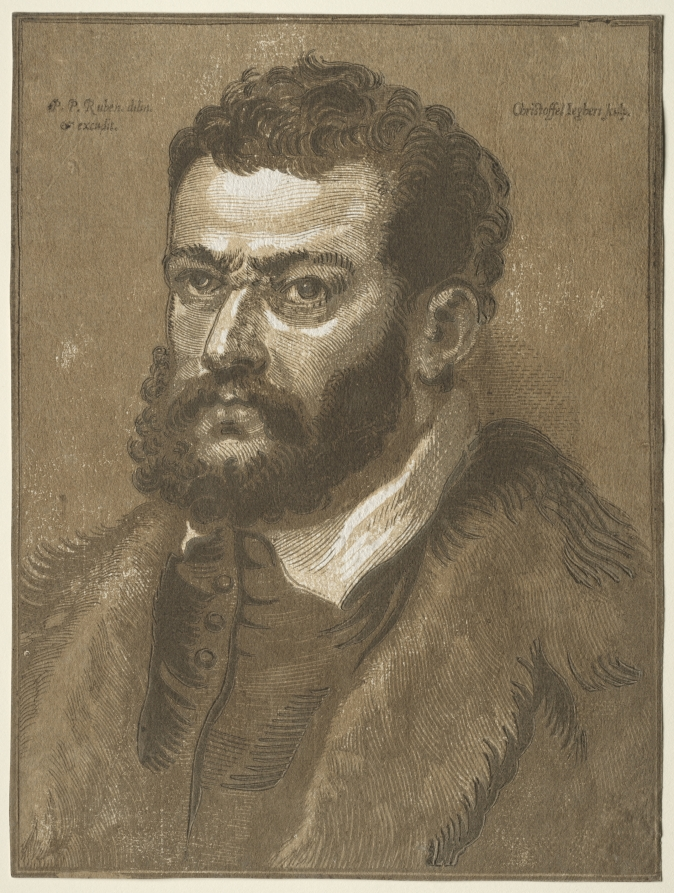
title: Bust of a Bearded Man (Doge Giovanni Cornaro)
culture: Flanders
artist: Christoffel Jegher (Flemish, 1596–1652/53)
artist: after Peter Paul Rubens (Flemish, 1577–1640)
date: 1632–36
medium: chiaroscuro woodcut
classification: Print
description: Among the finest chiaroscuros of the 17th century are those of Jegher, a professional woodcutter who made prints after designs by Peter Paul Rubens from about 1632 until 1640. Although Rubens had employed engravers to reproduce and propagate his designs from about 1609, he did not utilize woodcut until later. Jegher produced nine woodcuts, including two chiaroscuros, after his images. Bust of a Bearded Man, based on a painting, is printed from four blocks, none of which alone produces the outline of the entire image. The resulting print is very painterly and a masterpiece in chiaroscuro.